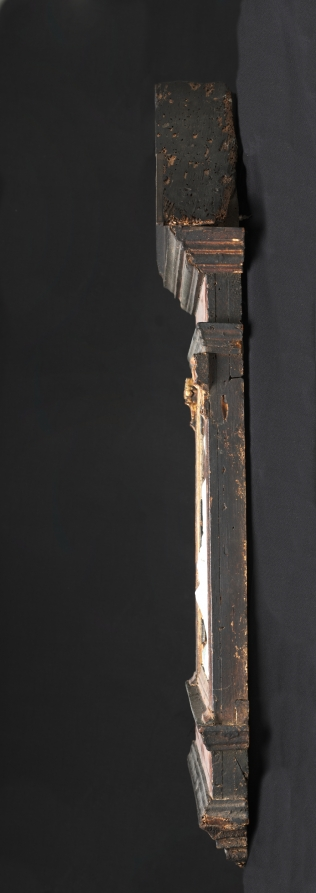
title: Madonna and Child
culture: Italy, 15th century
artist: Luca della Robbia (Italian, 1400?–1482)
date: c. 1460–1470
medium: glazed terracotta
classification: Sculpture